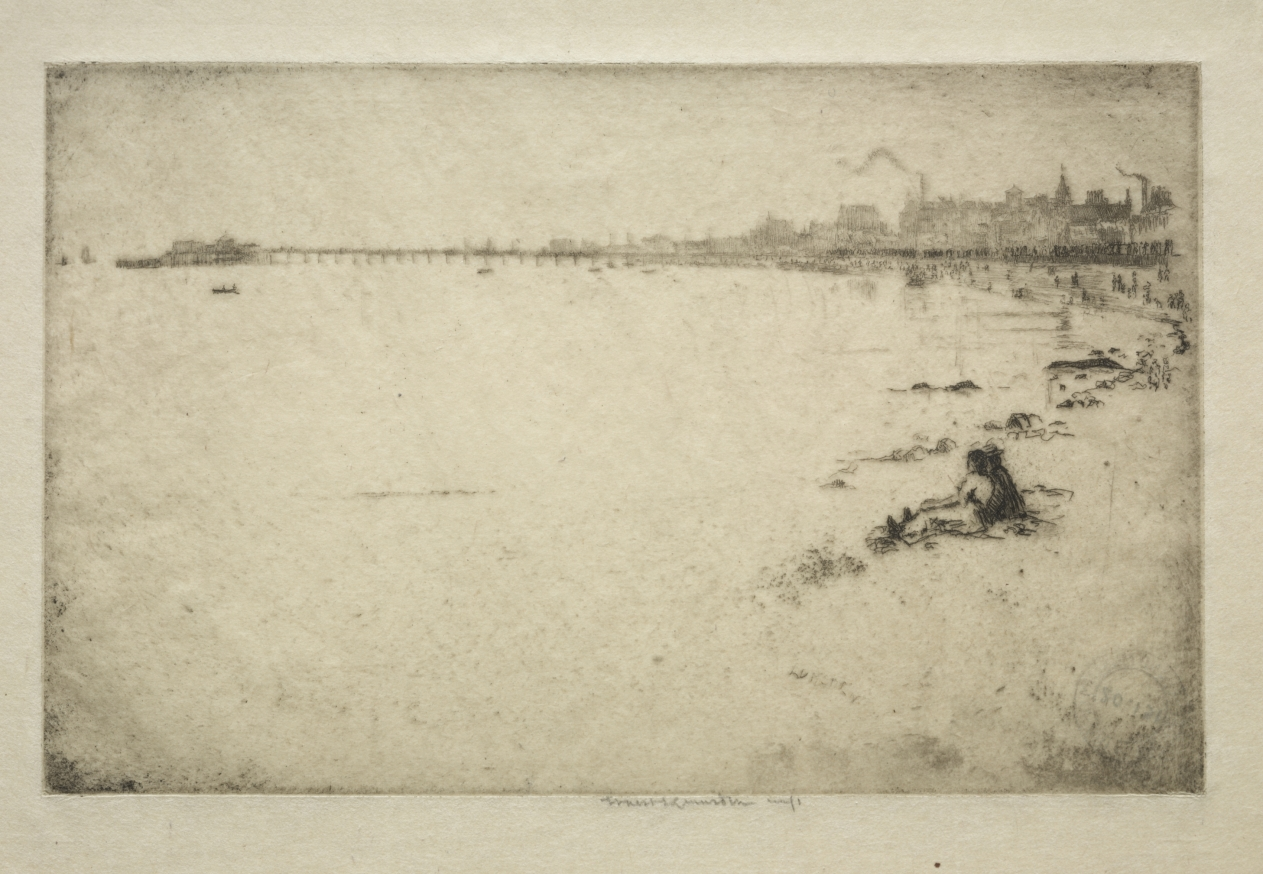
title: The Pier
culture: England, 20th century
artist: Ernest Stephen Lumsden (British, 1883–1948)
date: 1909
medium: etching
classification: Print